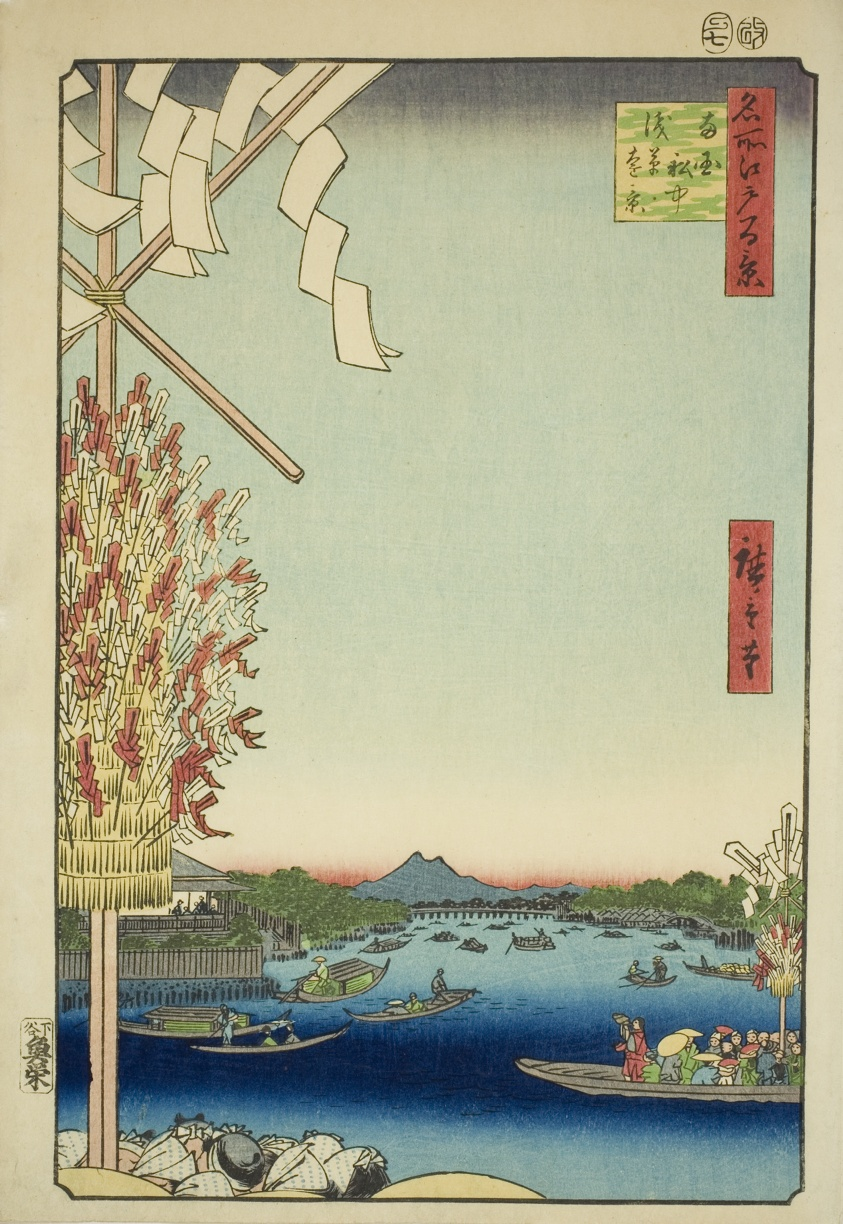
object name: Print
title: Asakusa River, Great Riverbank, Miyato River (Asakusagawa Okawabata Miyatogawa), from the series "One Hundred Famous Views of Edo (Meisho Edo hyakkei)"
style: Japanese (culture or style)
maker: Utagawa Hiroshige 歌川 広重; Japanese, 1797-1858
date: 1857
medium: Color woodblock print; oban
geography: Japan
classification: woodblock print; print; asian art